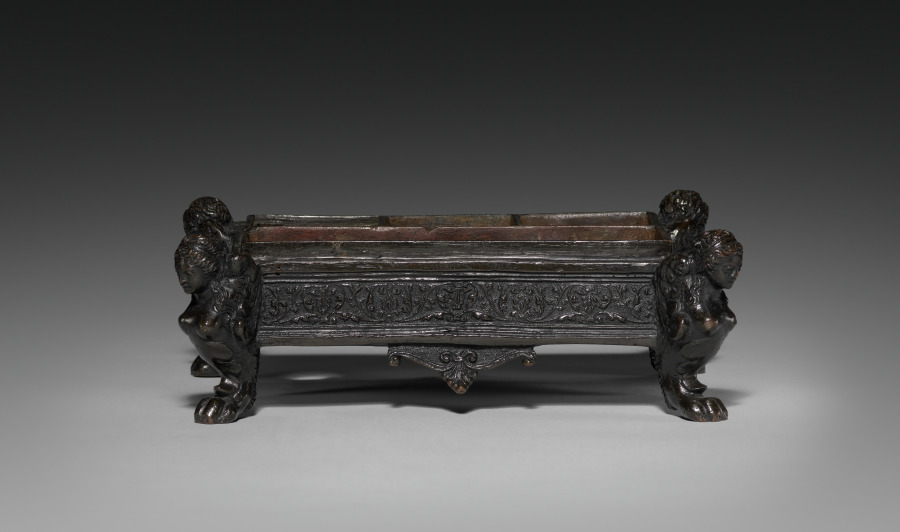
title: Writing Casket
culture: Italy, Ravenna, 16th century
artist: workshop of Severo da Ravenna (Italian, c.1496–c.1543)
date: c. 1525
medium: bronze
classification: Sculpture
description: The interior is divided into four compartments for storing writing implements and sand for blotting.